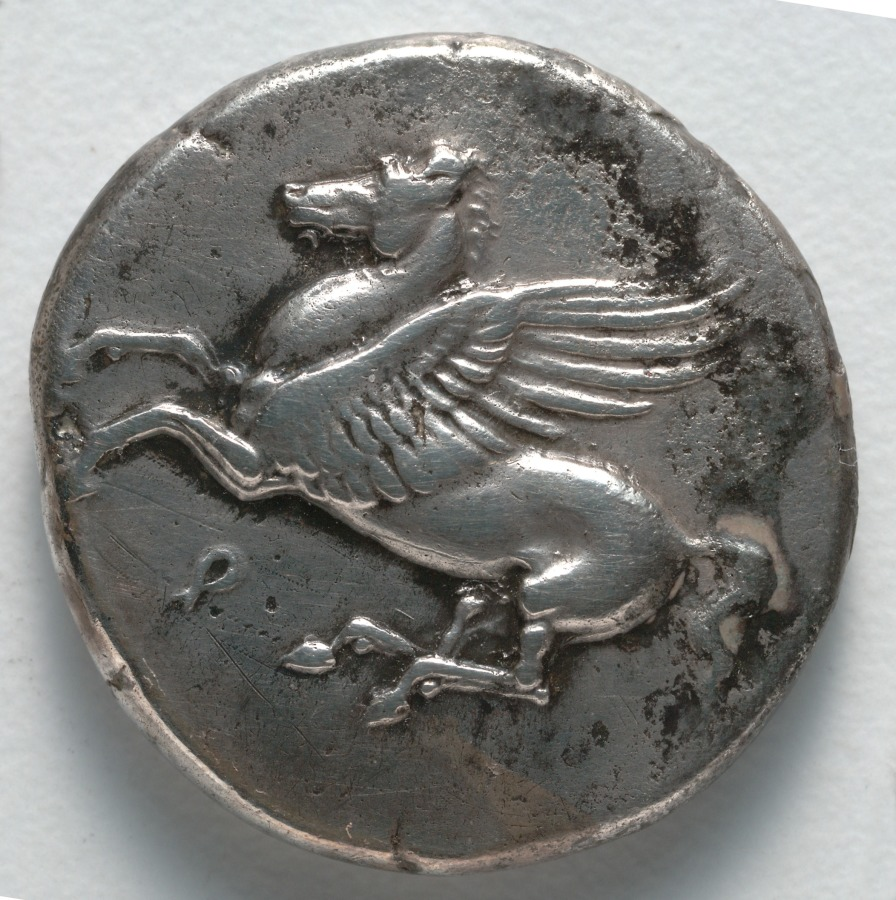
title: Stater: Pegasos (obverse); Head of Athena (reverse)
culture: Greece, Corinth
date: c. 350–338 BCE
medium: silver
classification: Coins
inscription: Ϙ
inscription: Α | Λ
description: On the obverse of this coin, the divine winged horse Pegasos takes flight, its front legs rearing up to the left. On the reverse, Athena, who gave the Corinthian hero Bellerophon the reins to tame Pegasos, wears a Corinthian-style helmet and is accompanied by a mask of the satyr-god Silenos. Repeated in this coinage, the story of Pegasos became an integral part of Corinthian mythology.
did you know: The archaic letter Ϙ, koppa, on the obverse abbreviates the early spelling of Corinth (ϘΟΡΙΝΘΟΣ).